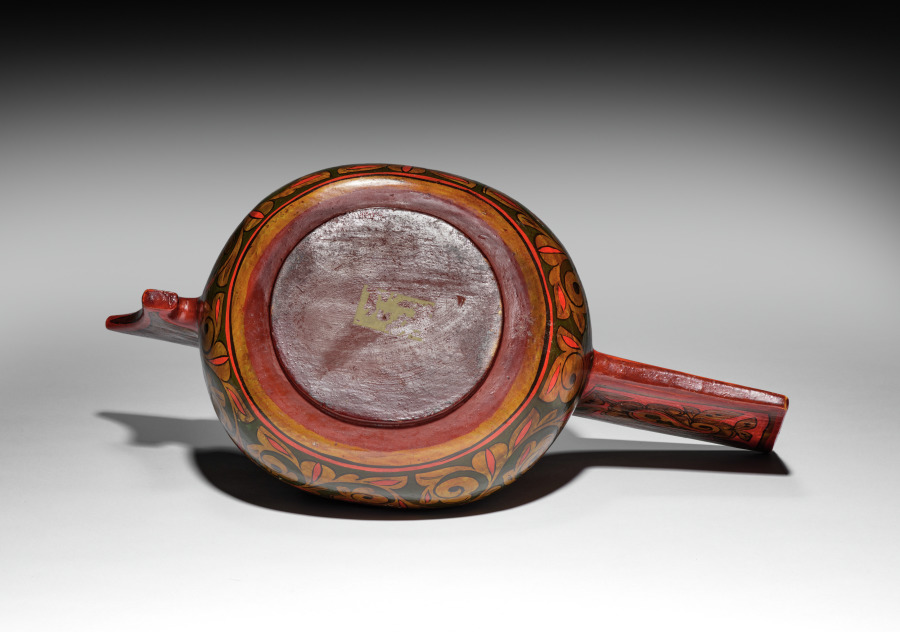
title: Wedding Cup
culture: Russia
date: before 1949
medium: lacquer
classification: Lacquer